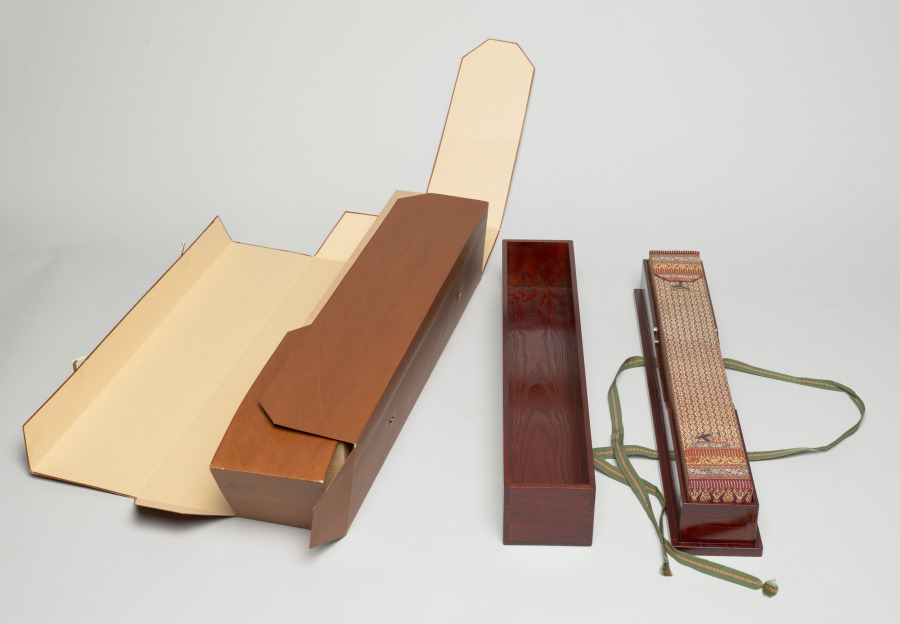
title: Coastal Landscape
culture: Japan, Momoyama period (1573–1615)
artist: Iwasa Matabei (Japanese, 1578–1650)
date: 1573–1615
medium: hanging scroll; ink on paper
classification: Painting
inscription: signed: signature unread